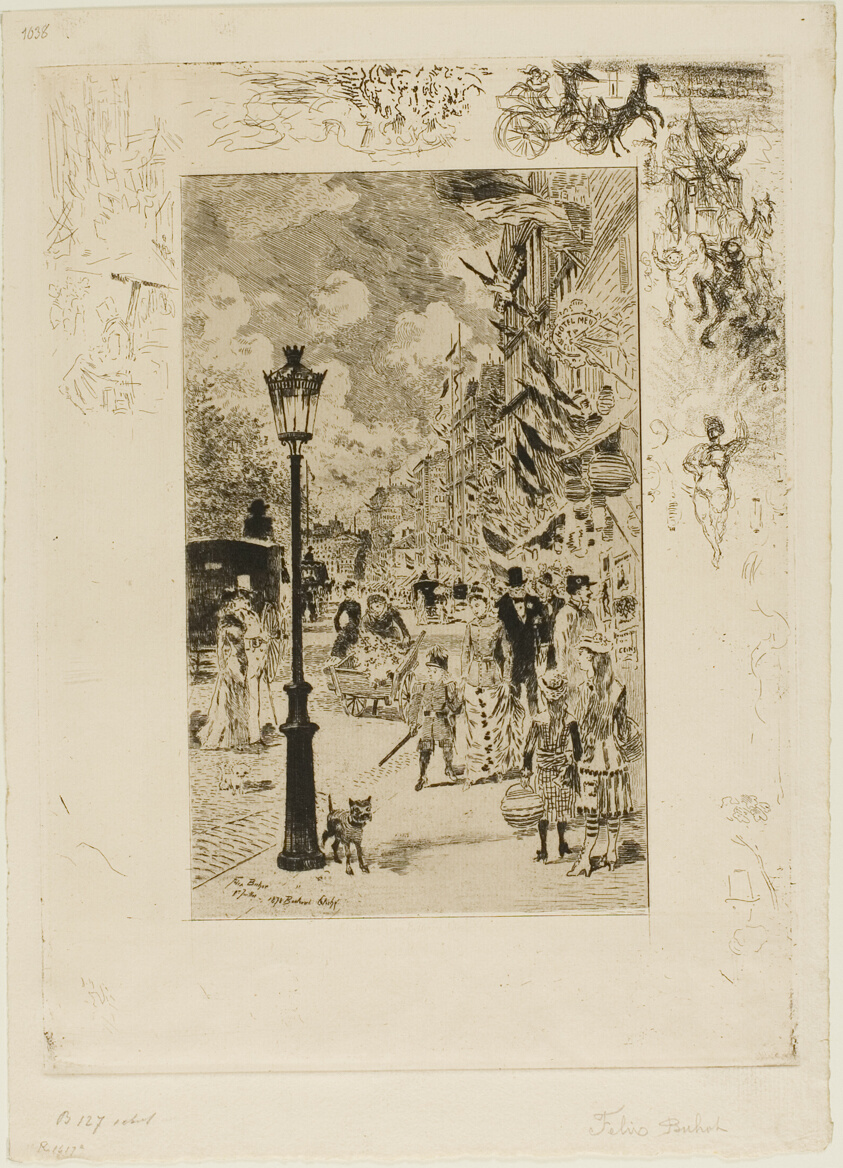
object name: Print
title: National Holiday on the Boulevard Clichy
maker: Félix Hilaire Buhot (French, 1847-1898)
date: 1878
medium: Etching and aquatint on ivory laid paper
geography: France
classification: etching; print; prints and drawing